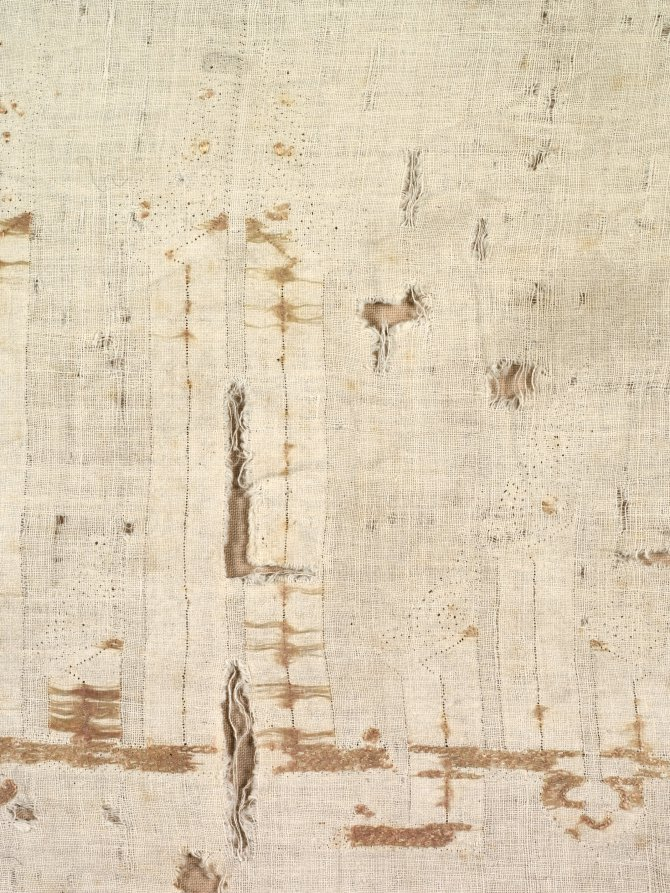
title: Tiraz of Caliph ‘Abd al-Rahman III, from the reliquary of Santa Librada, Cathedral of Seqüenza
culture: Spain, Cordoba, Spanish Umayyad period (756–1031)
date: 941–42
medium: Linen; silk: embroidery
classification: Embroidery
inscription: only the traces of a very large-scale elaborately foliated Kufic inscription preserved, largely in the form of needle holes but with a few small areas where the stitches are intact. This is approximately the second half of the original full inscription, which measured well over two meters long; the bulk of the original textile with the first half of the inscription was formerly preserved in the Cathedral of Siquenza. As preserved on the two fragments, the full inscription reads: "[Commander of the Be]lievers al-Masir li-Din al-Muslimin, may God support him! That which was made through the agency of Durri, his servant, in the year thirty and three hundred."